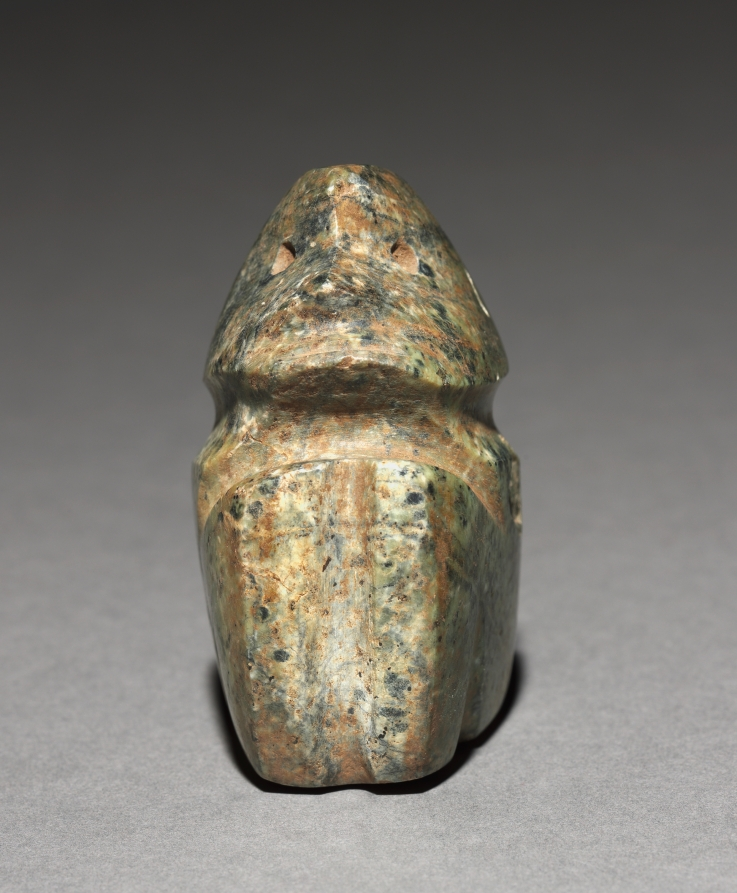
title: Seated Figure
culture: Mesoamerica, Mexico, Guerrero, Mezcala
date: 100 BCE–300 CE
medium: serpentine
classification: Sculpture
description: The Mezcala style takes its name from a river in its homeland, the Guerrero region of western Mexico. The style is known for small-scale sculptures characterized by sleek abstraction and often made of greenstone, one of the most precious materials that Mesoamerican artists worked. Unfortunately, little is known of the sculptures’ meanings and archaeological contexts.